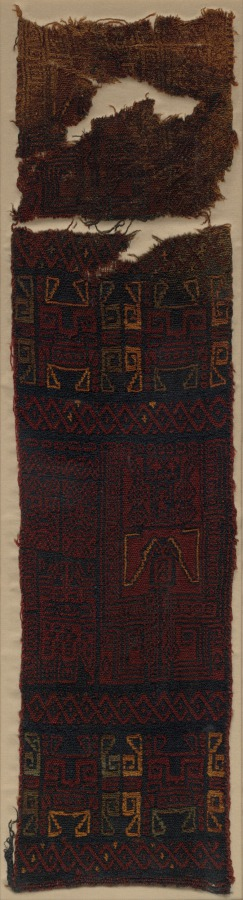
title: Textile Fragment with Frontal Deity Heads, Felines, and Interlace Pattern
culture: Peru, South Coast, Paracas, Yauca Valley(?)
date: 700–400 BCE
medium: camelid fiber; double-cloth with structural embroidery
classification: Textile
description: This textile fragment and (2005.13), belong to a group that represents Andean weavers’ earliest known achievements in double cloth, a technique that allows the creation of identical designs on both faces of the cloth but in reversed colors. They also record the devotion to abstraction typical of the Paracas style. One features three repeats of a highly geometrical standing deity with a fanged mouth. The other includes several stylized deity heads and a blocky, frontally posed feline. The type of garment that these fragments come from remains unknown.